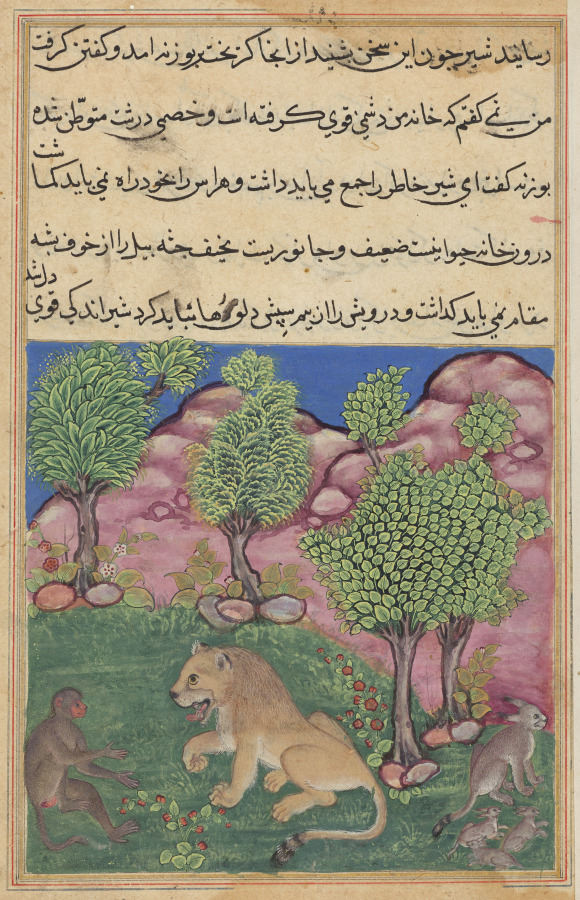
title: The monkey advises the suspicious lion to cast off fear and take possession of his territory, from a Tuti-nama (Tales of a Parrot): Twenty-ninth Night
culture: Mughal India, court of Akbar (reigned 1556–1605)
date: c. 1560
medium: gum tempera, ink, and gold on paper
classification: Painting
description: The monkey, acting as the lion’s chamberlain, encourages him to confront the family of lynx that have taken over his home. However, the lion is fearful, having been tricked into believing that the hidden lynx are vicious, lion-eating creatures.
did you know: The lynx family, unseen by the lion, appear on the right.